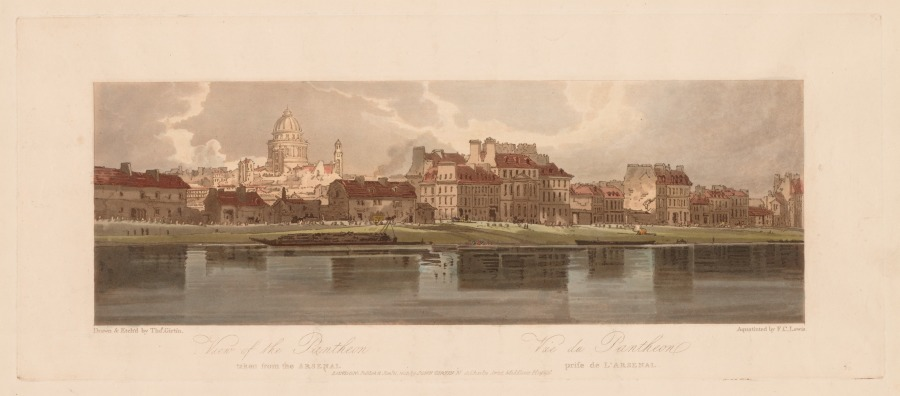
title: A Selection of Twenty of the Most Picturesque Views in Paris: View of the Pantheon taken from the Arsenal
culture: England, 19th century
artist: Thomas Girtin (British, 1775–1802)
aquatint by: Frederick Christian Lewis (British, 1779–1856)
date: 1803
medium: softground etching and aquatint printed in brown, hand-colored with watercolor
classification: Print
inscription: In plate; Drawn & Etch'd by Thos Girtin; Aquatinted by F. C. Lewis; LONDON: Pubd Jany 10 1803 by John Girtin, No. I, Little Newport Street, Gerrard Street, Soho.